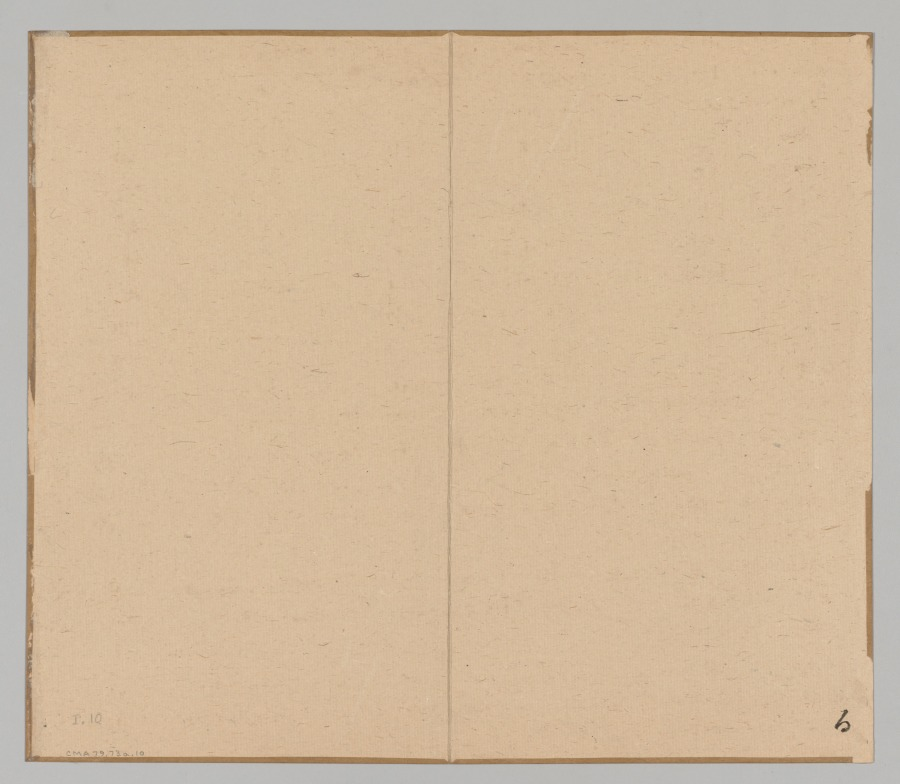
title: Reverberations of Taiga, Volume 1 (leaf 10)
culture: Japan, Edo period (1615–1868)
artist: Aoki Shukuya (Japanese, d. 1802)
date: mid- to late 1700s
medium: double-leaf from a pair of albums; ink and light color on paper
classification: Portfolio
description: Traditionally, young painters in Japan began their studies with an established master-painter. The master's compositions invariably became models that the apprentice copied to learn various ink and brush techniques. Shukuya was a pupil of the famous Kyoto artist Ikeno Taiga, whose style is reflected in these sketches of rocks, trees, and mountains.